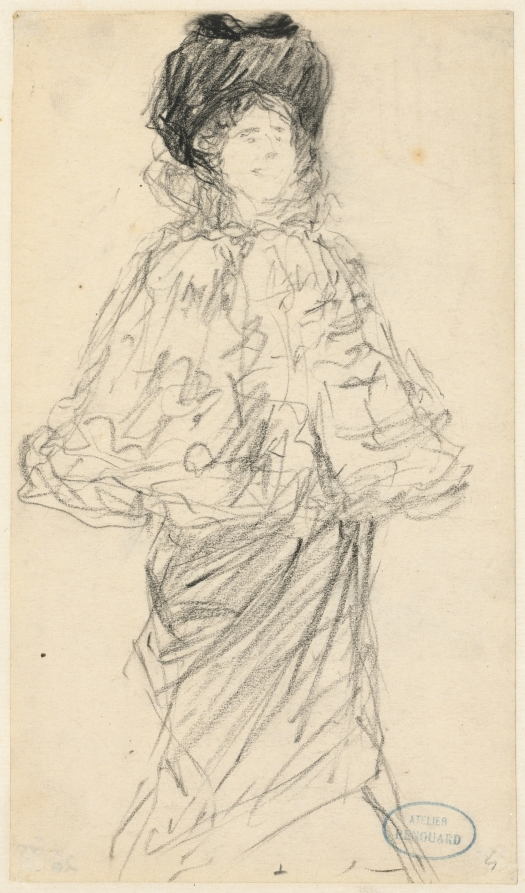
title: Standing Woman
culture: France, late 19th-early 20th century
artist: Charles Paul Renouard (French, 1845–1924)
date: c. 1900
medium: black crayon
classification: Drawing